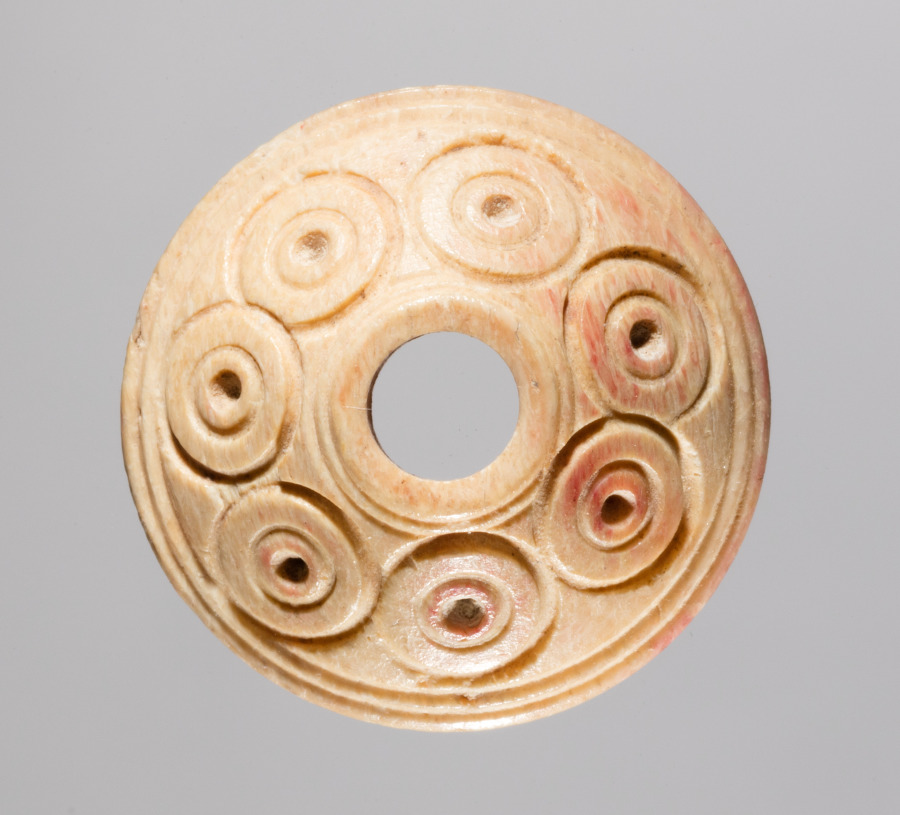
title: Spindle Whorl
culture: Iran, early Islamic period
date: 700s - 900s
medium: bone, incised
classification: Spindle Whorl